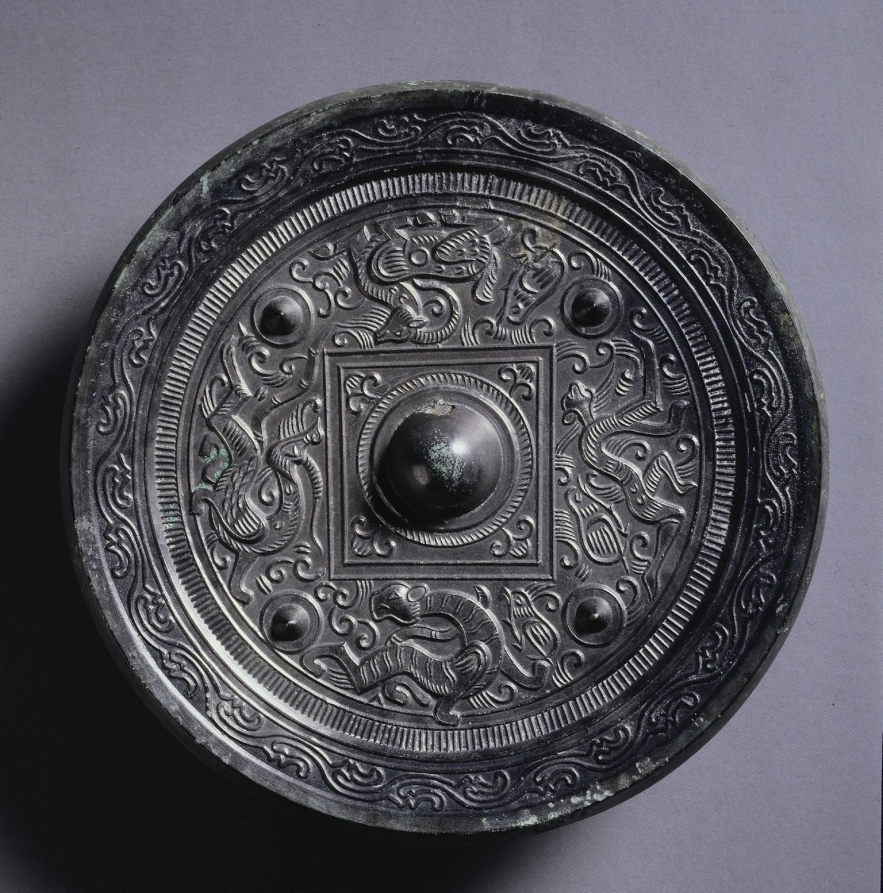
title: Mirror with a Central Square, an Immortal, and Auspicious Animals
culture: China, Eastern Han dynasty (25–220 CE)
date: 100s CE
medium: bronze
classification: Metalwork